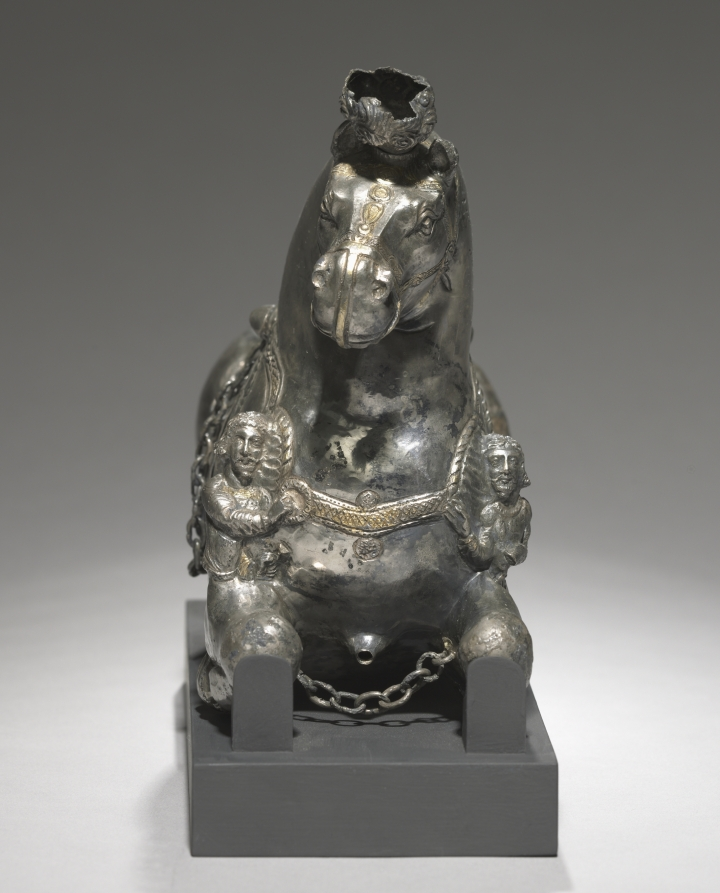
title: Horse-Shaped Drinking Vessel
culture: Iran, Sasanian Empire (224–651 CE)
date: 200–325 CE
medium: silver, partially gilt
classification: Metalwork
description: The horse was a favorite artistic subject in ancient Iran, where horse breeding flourished. This muscular Sasanian stallion was descended from the royal and sacred Nisean breed of the Achaemenian Persians. Although Sasanian horse trappings were elaborate, they did not include stirrups for mounting. In this rendition, the steed lies still, as camels in the Near East do today, waiting for its rider to mount. The medallions on each shoulder contain busts, perhaps of rulers of different parts of the Sasanian Empire, holding their rings of authority.